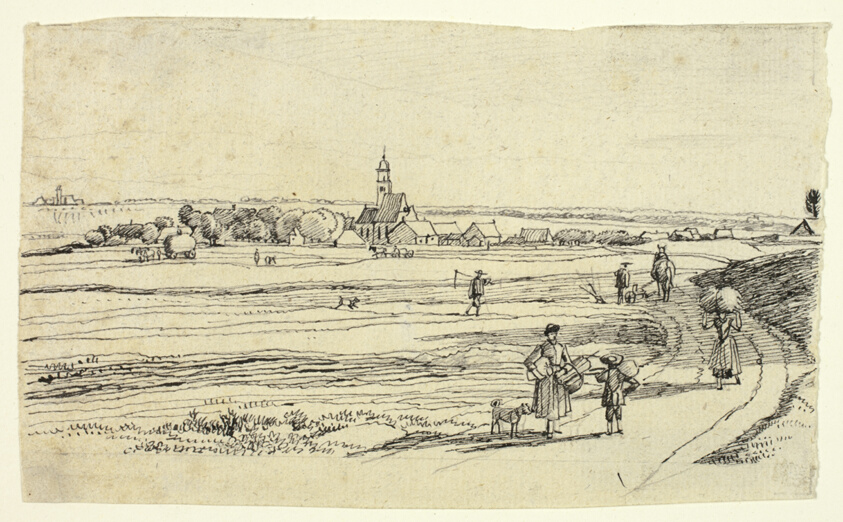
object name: Drawing and Watercolor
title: Study for the Engraving Thalkirchen, from series Views of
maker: Wilhelm Alexander Wolfgang von Kobell (German, 1766-1855)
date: c. 1818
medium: Pen and black ink over graphite on ivory laid paper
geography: Germany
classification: pen and ink drawings; drawings (visual works); prints and drawing